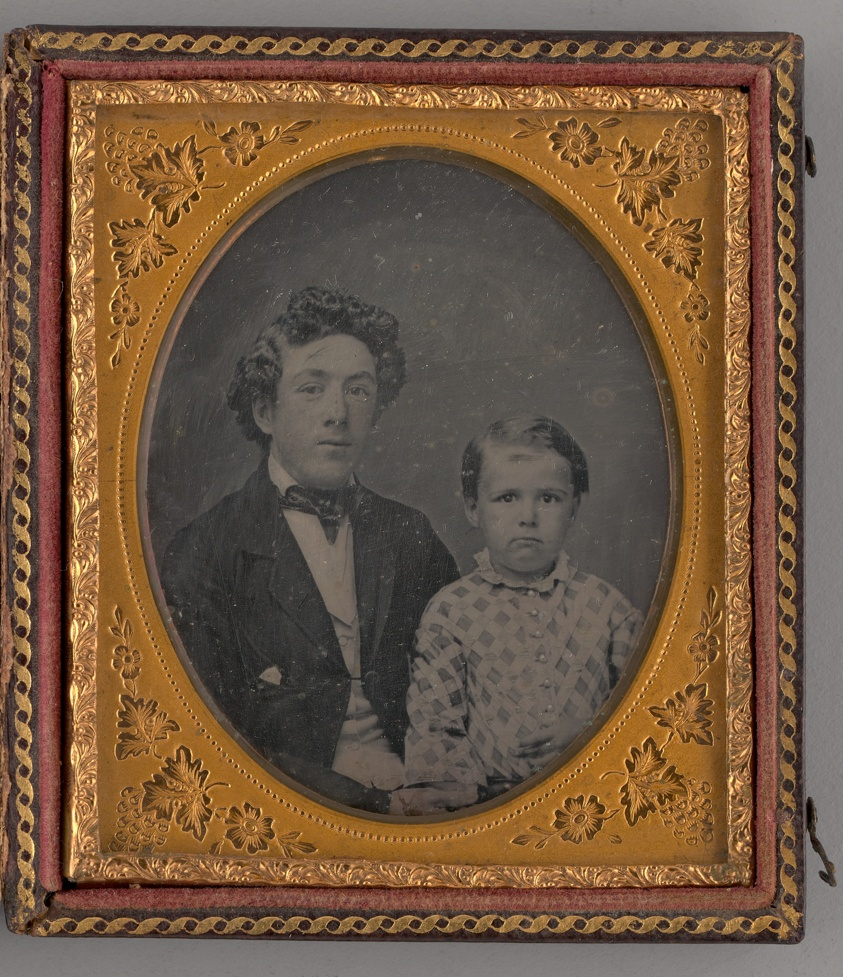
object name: Photograph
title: Untitled (Portrait of a Man and a Boy)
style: 19th century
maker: Unknown maker; American, 19th century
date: 1855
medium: Daguerreotype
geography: United States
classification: portrait; photograph; photographic process; photography; portrait; daguerreotype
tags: lundberg collection, portraits, portraits: multiple subjects, portraits: male subject, portraits: child subject, boys, men, Male, portrait